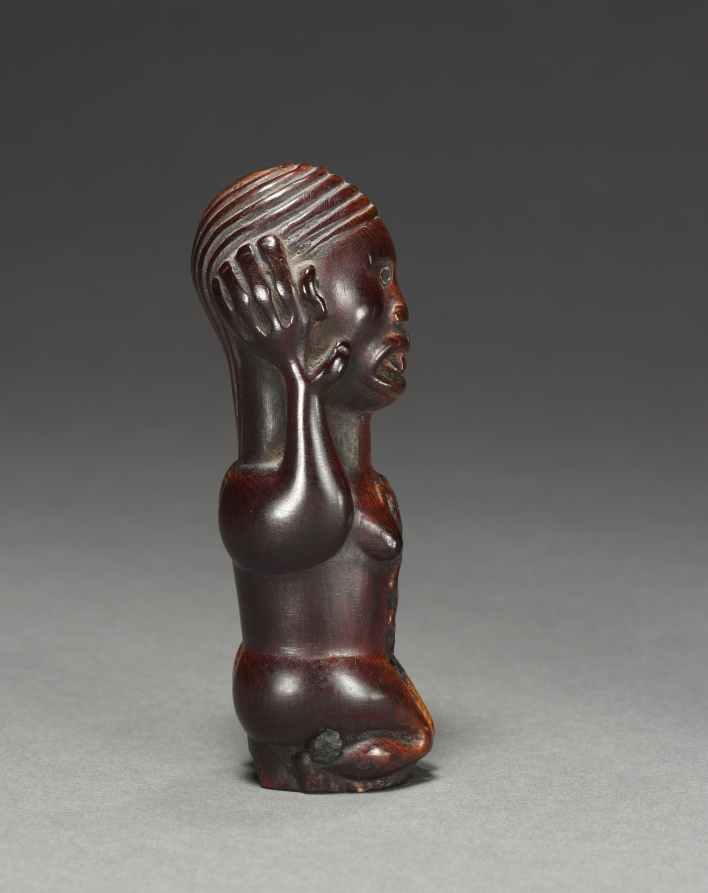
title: Female Figurine or Finial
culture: Central Africa, Democratic Republic of the Congo (most likely), Cabinda, or Republic of the Congo, Kongo people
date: late 1800s-early 1900s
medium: Ivory and iron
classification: Sculpture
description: This ivory figurine most likely served as the finial of a wooden staff or scepter, and owned and used by a high-ranking official or a ritual specialist. The combination of its features is quite unusual. The kneeling attitude is rather common and typically denotes respect. However, the position of the hands is anatomically incorrect with the thumbs toward the face. The idea of the striking hand gesture may refer to mourning.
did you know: The oversized hands with elongated fingers are positioned in an anatomically incorrect manner with the thumbs toward the face.